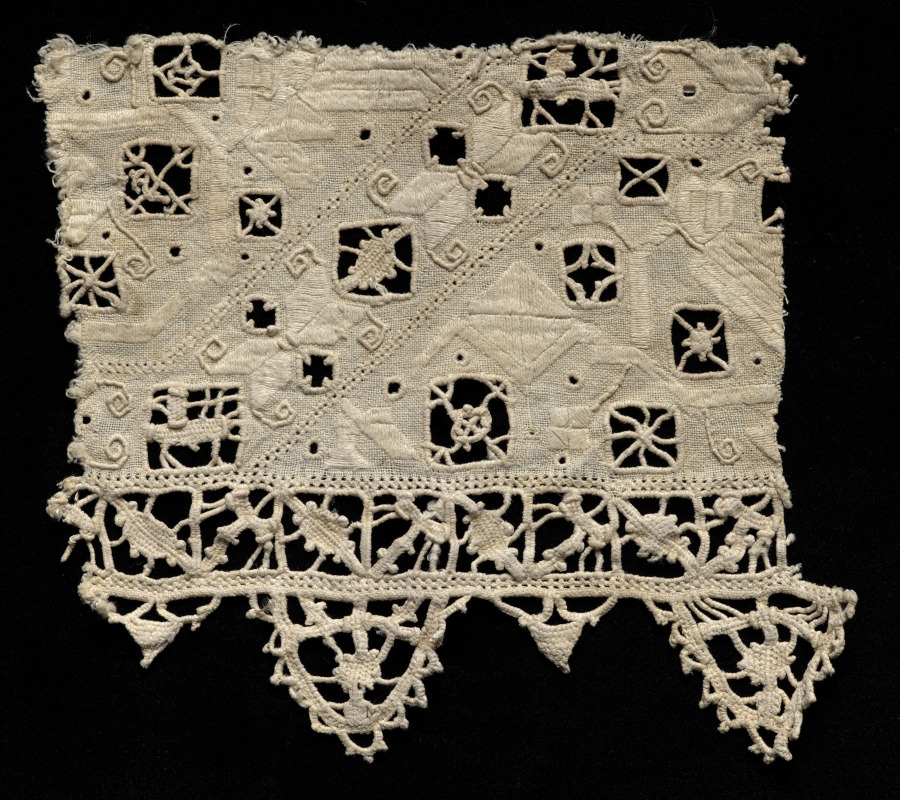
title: Lace Fragment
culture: Italy, 1600s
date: 1600s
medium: Linen: needle lace (cutwork)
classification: Lace